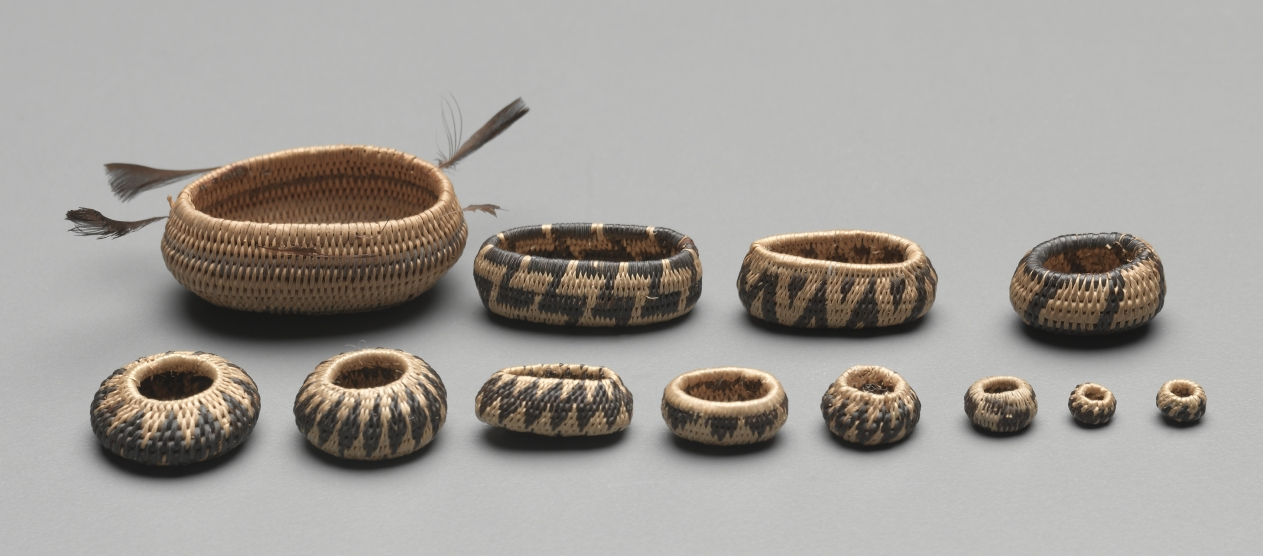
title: Miniature Oval Basket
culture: California, Pomo, late 19th-early 20th century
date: late 1800s-early 1900s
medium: plant materials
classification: Basketry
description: Miniature baskets were made to demonstrate the basket-maker’s virtuoso skill, and these tiny marvels seem to be no exception—the smallest are just a few millimeters wide but still patterned. For such fine work, dexterity was required as much for preparation of materials as for weaving.